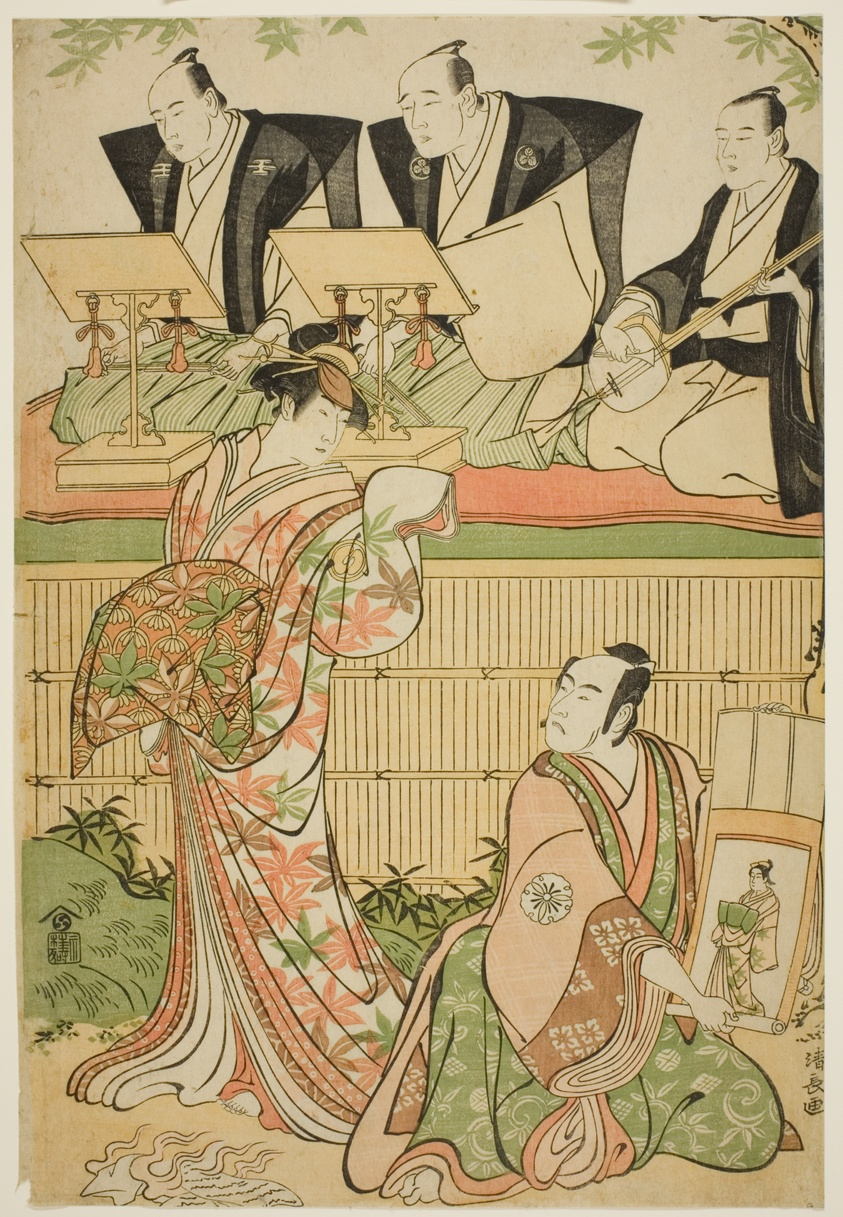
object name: Print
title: The Actors Matsumoto Koshiro IV as Ukita Sakingo and Sawamura Sojuro III as the ghost of the courtesan Takao, in the play "Ominaeshi Sugata no Hatsuaki," performed at the Nakamura Theater, 1788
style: Japanese (culture or style)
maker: Torii Kiyonaga (Japanese, 1752-1815)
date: 1788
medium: Color woodblock print; oban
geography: Japan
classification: woodblock print; print; asian art